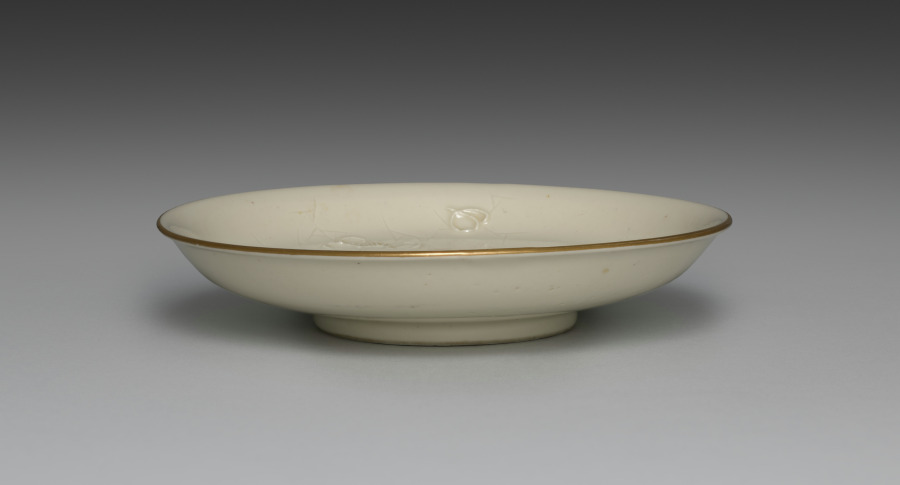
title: Medium-sized Dish from Dining Set with Plum Blossoms and Cracked-Ice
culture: Japan, Meiji period (1868–1912)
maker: Seifū Yohei II (Japanese, 1844–1878)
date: c. 1875–78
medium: Porcelain with molded designs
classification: Ceramic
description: Each item in this set has a delicate low-relief design of flowering plum branches over scattered, intersecting lines meant to resemble the cracked-ice surface of a frozen body of water and is signed on the base in gold pigment. While Yohei II produced many fine works in underglaze blue, like those produced by Kiyomizu Shichibei, he also made works in quite different styles later in his career, from the early 1870 s. In 1873, he was appointed purveyor to the Industrial Center of Kyoto Prefecture, a designation associated with Kyoto’s efforts to reach an international market through the port of Kobe; and from 1875 until his death, he was involved in national-level projects to present Japanese ceramics across the world. It was during this period that Yohei III was apprenticed to Yohei II, and it has been suggested that this set may in fact be an early example of Yohei III’s work, which he signed with his teacher’s name. Decorated with flowers resembling Japanese textile motifs, the set calls to mind the design of Yohei II’s pair of vases with plum blossoms in the Victoria and Albert Museum. Here, the elaborate trees created for a formal public exhibition setting have been translated into the approachable blossoms of the genteel domestic environment. While the designs are consistent across the pieces, each raised flower petal and pistil and each incised line in the ice was done by hand, so the cups, bowls, and dishes are similar yet unique. The bottoms of two boxes once identified the set’s owner, but the information has been deliberately obscured with black ink. However, inscriptions still visible appear to indicate two occasions, once at the end of July 1886 , and once again in June 1916 , when parts of the set were requested from Hokura in Niigata Prefecture. The location corresponds to a neighborhood in the present-day city of Jōetsu. The surname Tsuji 辻 also appears on a paper tag affixed to one of the box cloths. Future research may possibly reveal more about their provenance. A vase by Yohei III in a private collection combines the formal grandeur of the Yohei II vases in the Victoria and Albert Museum with the gentler design of this dining set, placing flowering plum trees against soft, scalloped-edge clouds resembling those in golden screens.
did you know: The dining wares have a creamy white coloration that the four boxes containing them identify as Korean in style.